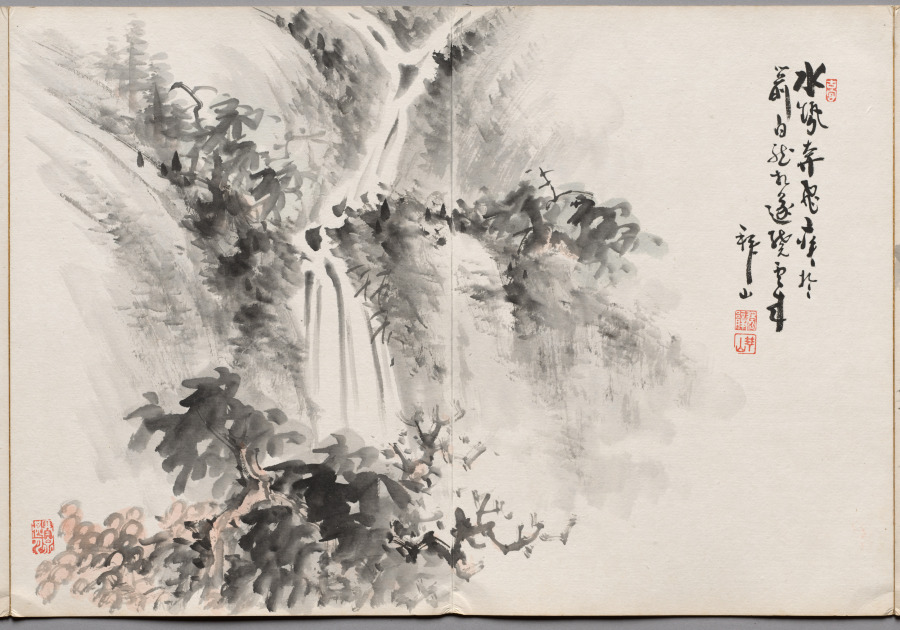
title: Painting Ten from Album of Paintings by Haizan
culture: Japan, Meiji period (1868–1912) or Taishō period (1912–26)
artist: Yoshitsugu Haizan (Japanese, 1846–1915)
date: late 1800s–early 1900s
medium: page spread from double-sided accordion album; ink and color on paper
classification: Painting